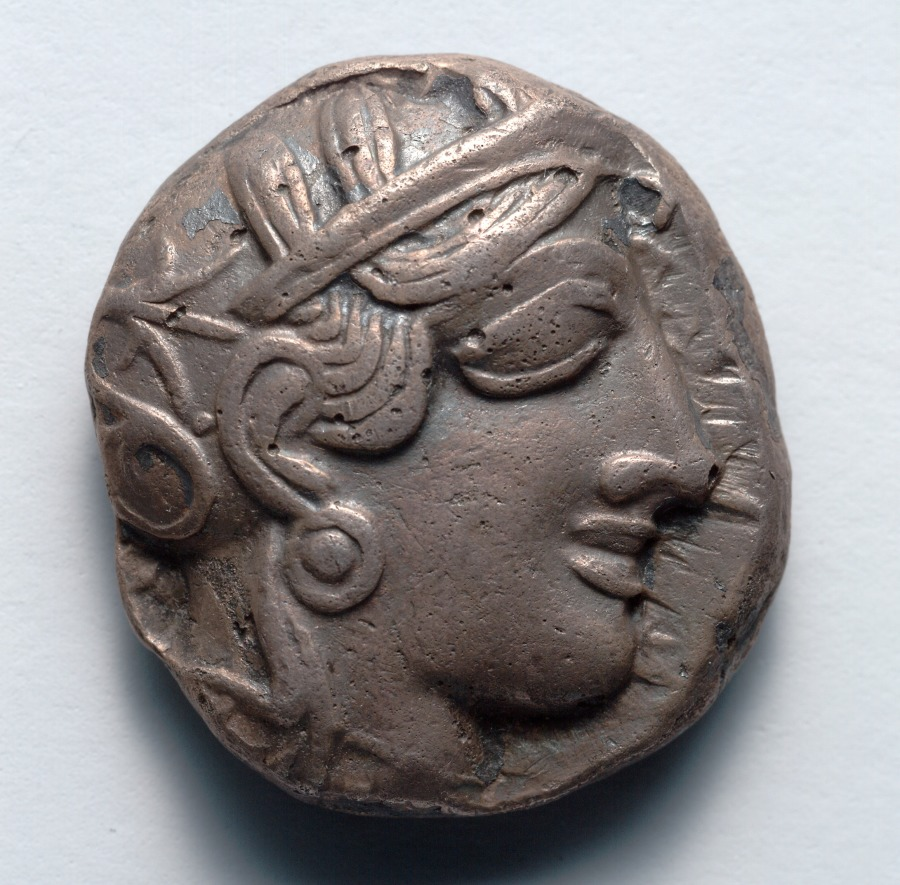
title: Tetradrachm: Head of Athena (obverse); Owl (reverse)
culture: Greek, minted at Athens (Attica)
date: 480–449 BCE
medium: silver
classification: Coins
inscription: ΑΘΕ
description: Incorporating the first three letters of the city name—ΑΘΕ—with then-iconic images of the patron goddess Athena and her owl, the Athenian tetradrachm was among the most widely traded and most recognizable coins of the ancient world. The olive leaves on Athena’s helmet and the small crescent moon behind the owl date this coin after the Persian Wars.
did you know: The three letters on the reverse—ΑΘΕ—mark this as an Athenian coin.